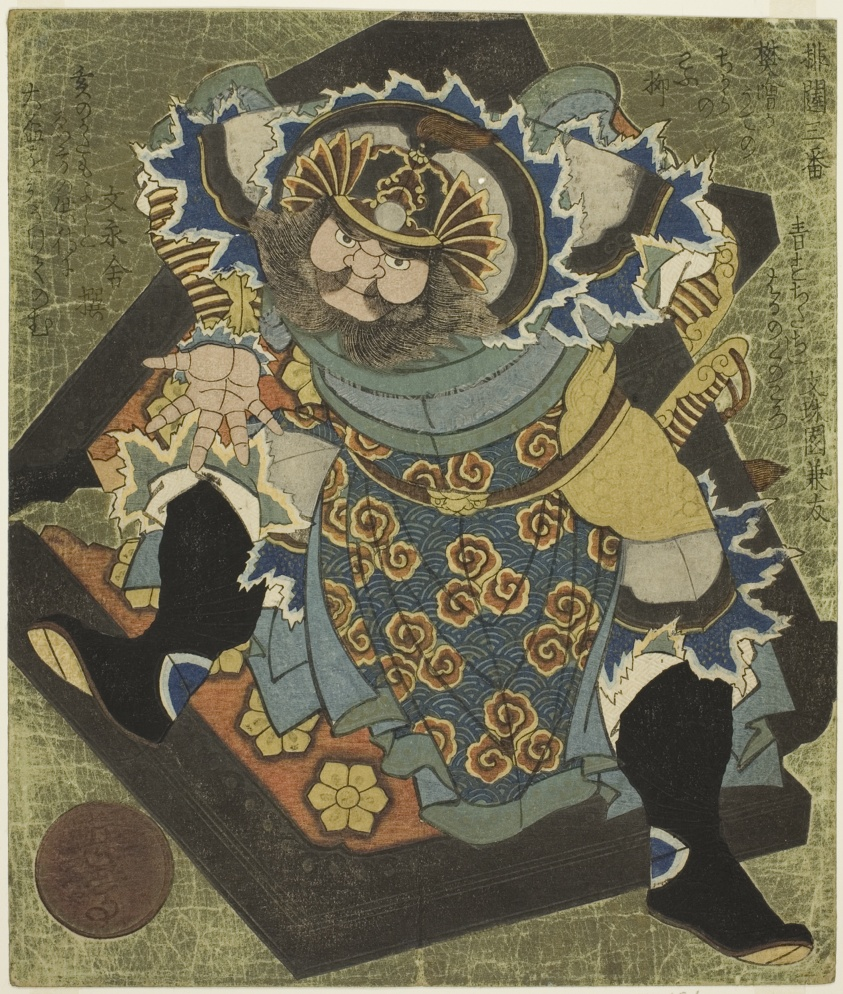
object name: Print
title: Fan Kuai (Hankai), from the series "Three Broken Gates (Haitatsu sanban)"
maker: Yashima Gakutei (Japanese, 1786 (?)-1868)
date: 1827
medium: Color woodblock print; shikishiban, surimono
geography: Japan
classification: woodblock print; print; asian art